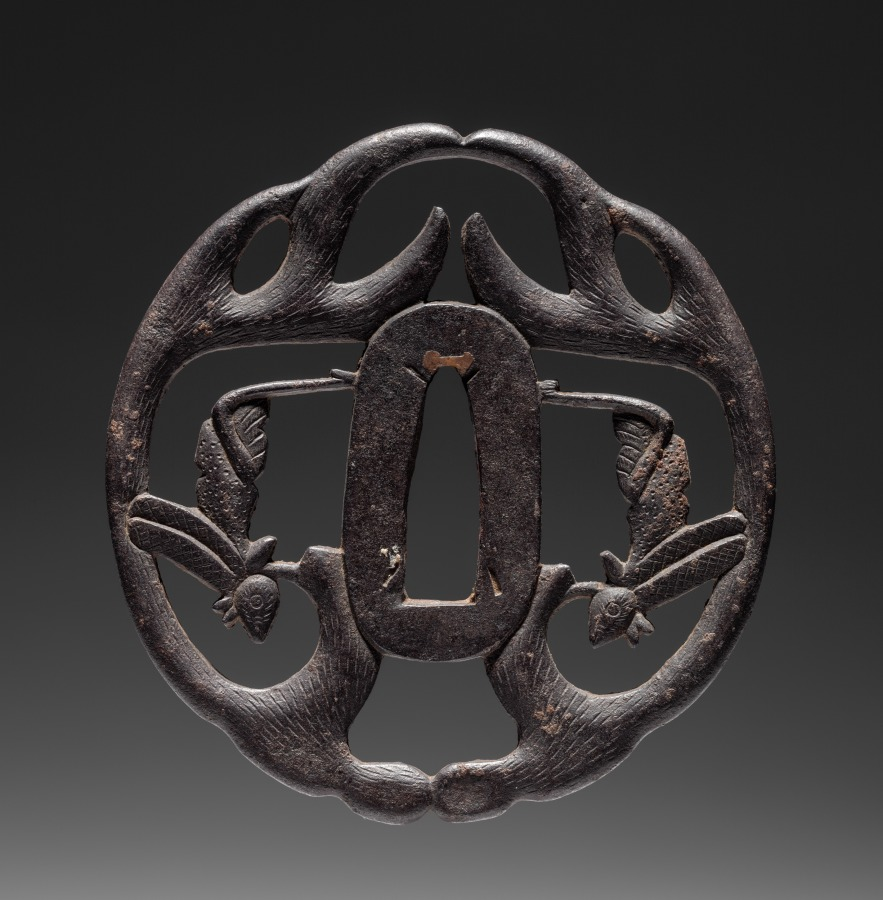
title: Sword Guard (Tsuba)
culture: Japan, possibly Edo period (1615-1868)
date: c. 1615–1868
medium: iron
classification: Arms and Armor